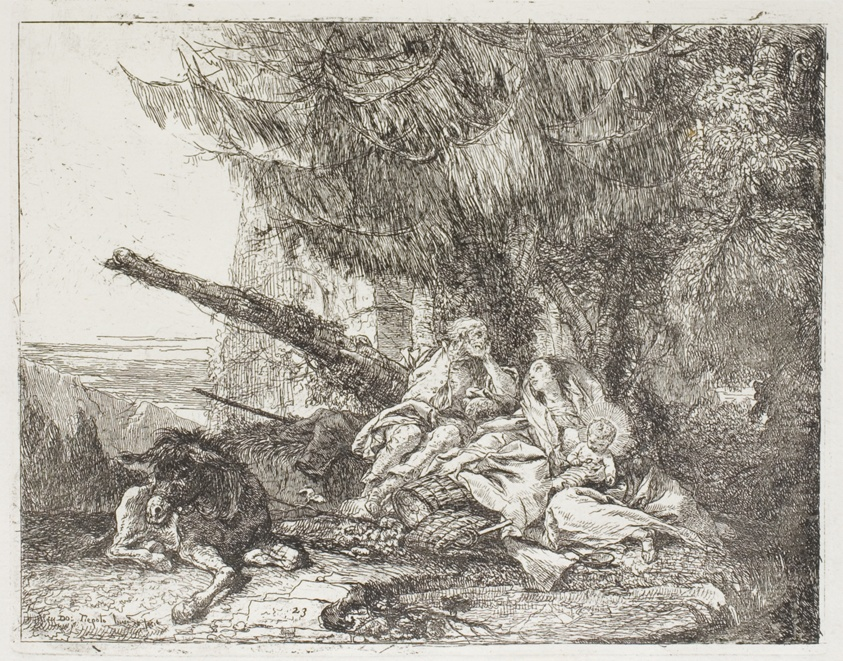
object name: Print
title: The Holy Family Resting in a Wood, plate 23 from The Flight into Egypt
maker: Giovanni Domenico Tiepolo (Italian, 1727-1804)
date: 1753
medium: Etching on paper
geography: Italy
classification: etching; print; prints and drawing